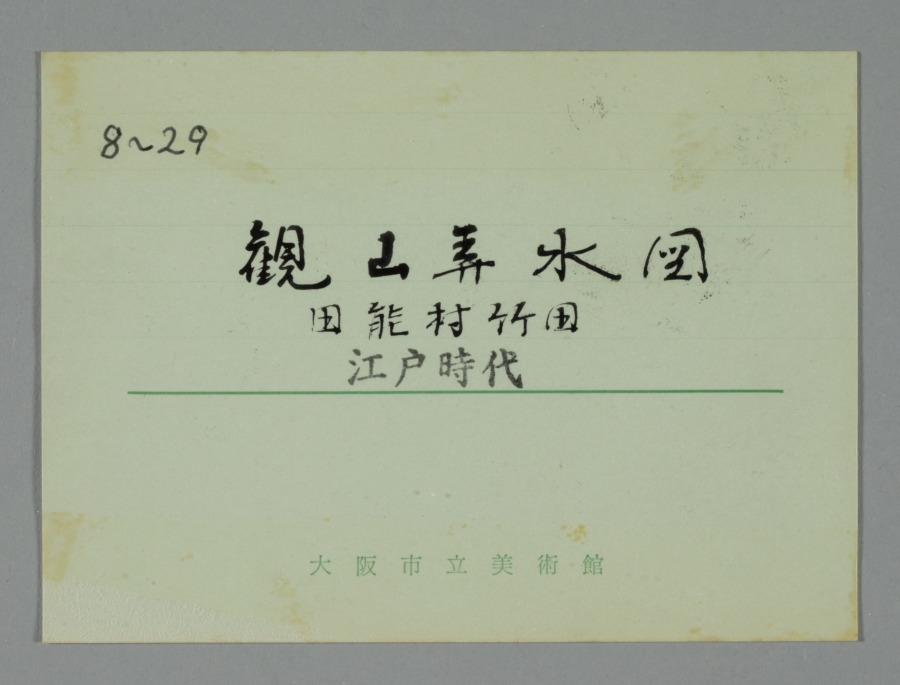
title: Mountain View and Blue Water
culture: Japan, Edo period (1615–1868)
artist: Tanomura Chikuden (Japanese, 1777–1835)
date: early 1800s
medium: hanging scroll; ink, color, and gold on paper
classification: Painting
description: Tanomura Chikuden was an eminent painter whose adopted son, Tanomura Chokunyū (1814–1907), was Seifū Yohei III’s painting teacher. This work was displayed at a gathering commemorating the 10th anniversary of Chokunyū’s death, something we know only because its custom-made box and archival documents have been carefully kept together. The box inscription also confirms that Chikuden was emulating the style of the Mi family of painters, active during China’s Southern Song dynasty (1127–1279). The painting’s Chinese-style silk wrapper is inscribed and sealed on its interior by members of Chokunyū’s community.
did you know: The mountain shapes are built up with multiple small wet strokes.